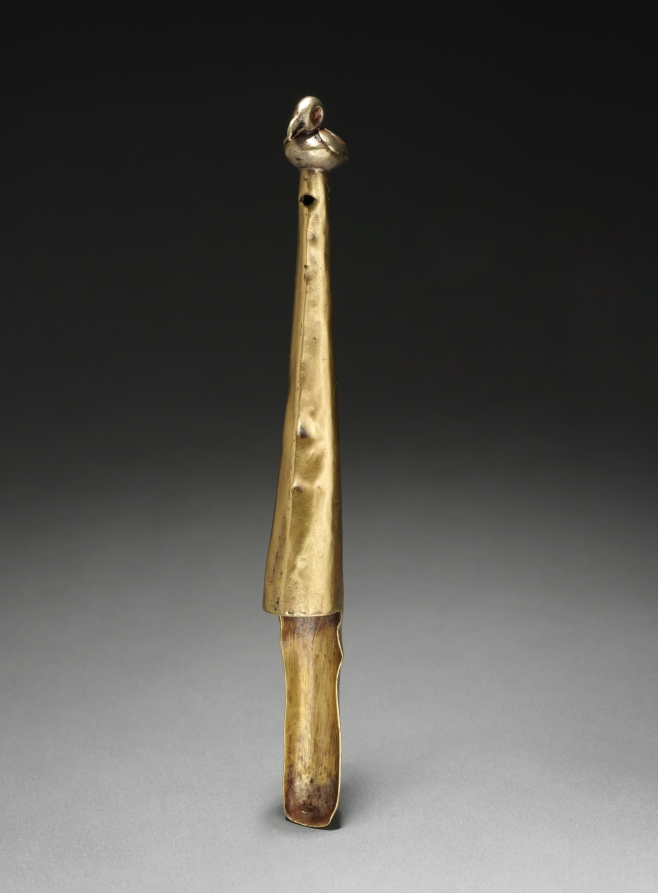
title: Spoon with Bird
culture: Peru, North Highlands, Chavín de Huantar(?), Chavín style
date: c. 500–200 BCE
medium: hammered and cut gold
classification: Metalwork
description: There seems to be a link between Chavín religion and appearance of the Andes’ first large precious-metal objects, made using revolutionary new metallurgical processes. Chavín may have developed these technical innovations to express the inexpressible, the "wholly other" nature of its religion. In many areas, elite men and women wore the ornaments as emblems of their ties to this religion, and eventually were buried with them. These 16 objects, along with three others not in the museum’s collection, are said to have come as a group from Chavín itself.